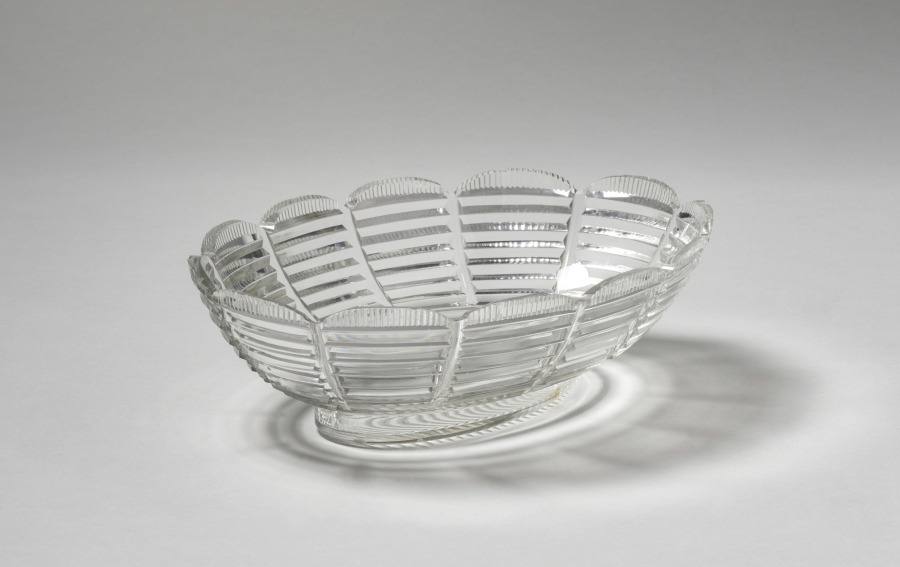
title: Centerpiece (glass bowl)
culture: England, 18th century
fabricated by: William Pitts (British)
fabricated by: Joseph Preedy (British)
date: 1792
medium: silver and glass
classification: Silver